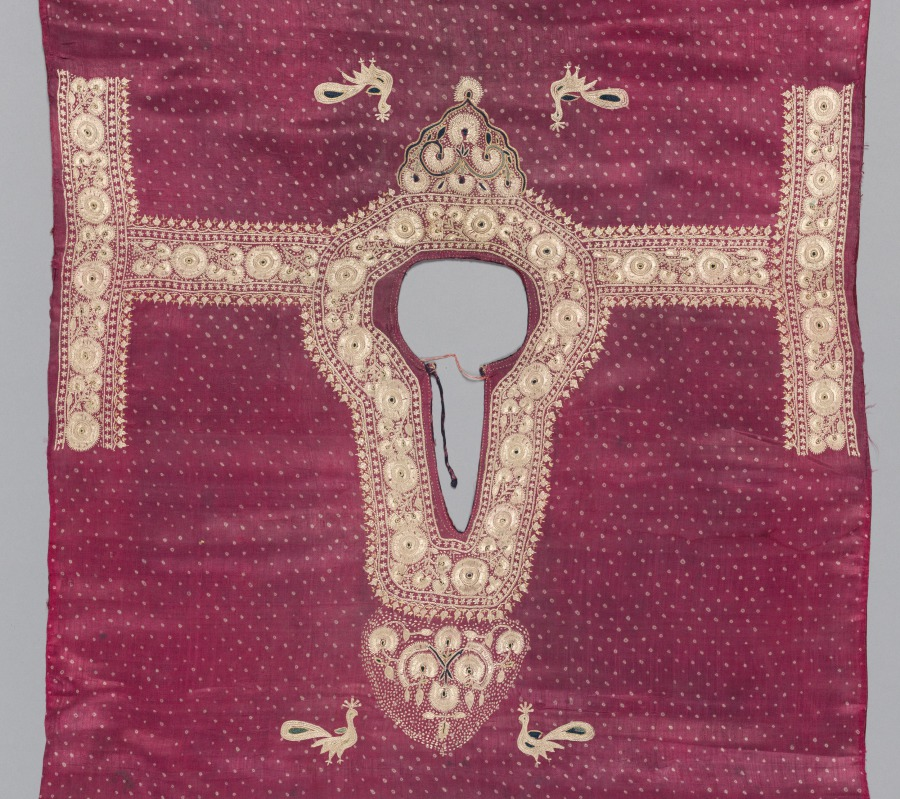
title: Shirt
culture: Western India, Gujarat, Kachchh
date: early 1900s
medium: silk thread on silk ground, embroidery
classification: Embroidery